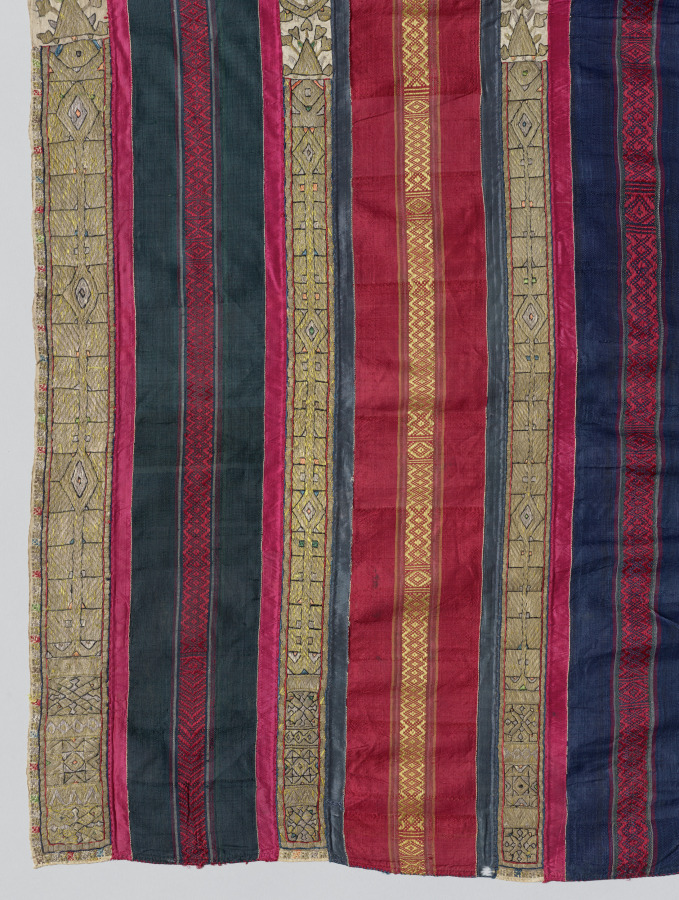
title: Curtain (one of a pair)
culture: Africa, North Africa, Tunisia, Djerba, Tunisian weaver(s) and embroiderer(s)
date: 1600s–1700s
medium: Silk, linen, metal, and dye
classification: Embroidery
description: One of a pair, this curtain displays colorful silk bands with woven geometric motifs, and cream bands with gold-embroidered plants, birds, six-pointed stars, and the khamsah (خمسة), an open five-fingered hand. Birds and the tree of life were popular good luck or fertility symbols linked to marriage. This curtain’s cosmopolitan motifs would have resonated with Jews, Muslims, and Christians alike, reflecting its creation on multiethnic and multireligious Djerba, an island off the Tunisian coast. There, both goldsmithing and gold thread embroidery were done by Jewish artisans (male and female, respectively). The fine materials suggest this curtain once hung in a wealthy home or for special occasions; interior wall hangings were typically made from rough wool.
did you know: When first acquired over a century ago, this curtain had fringe at its lower end.